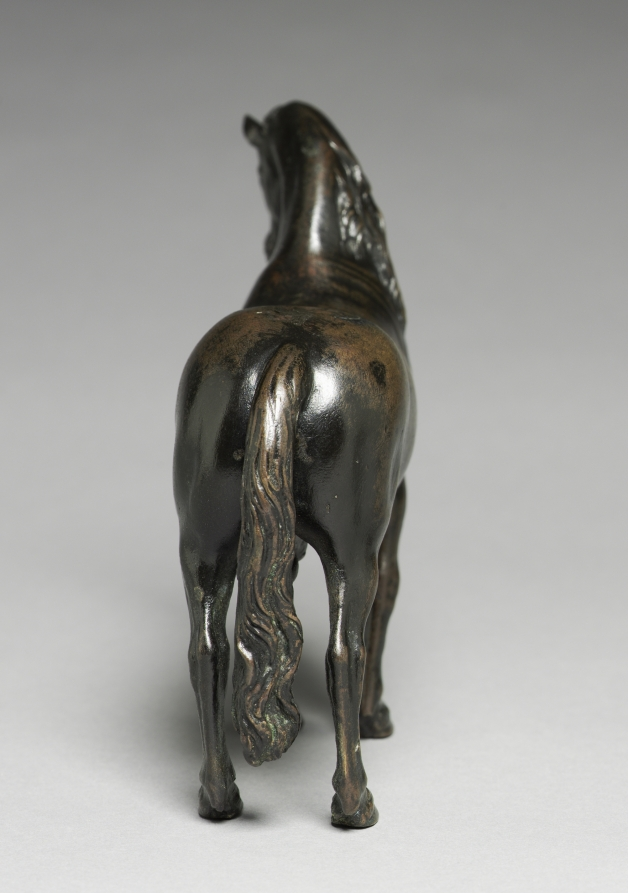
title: Horse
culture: Germany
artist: possibly cast after a model by Francesco Fanelli (Italian, 1661)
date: 1630s or later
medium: bronze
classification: Sculpture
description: Shortly after its acquisition, this work was published as a model for an equestrian monument of Emperor Maximilian by Gregor Erhart, cast by one of Maximilian's bronze founders in Augsburg. Recent scholars have questioned the connection to Erhart and have placed it closer to Fanelli, due to the rendering of the horse's head and the waxy overall feel of the modeling. Related works in Braunschweig and (formerly) Berlin already carry attributions to a Fanelli model.